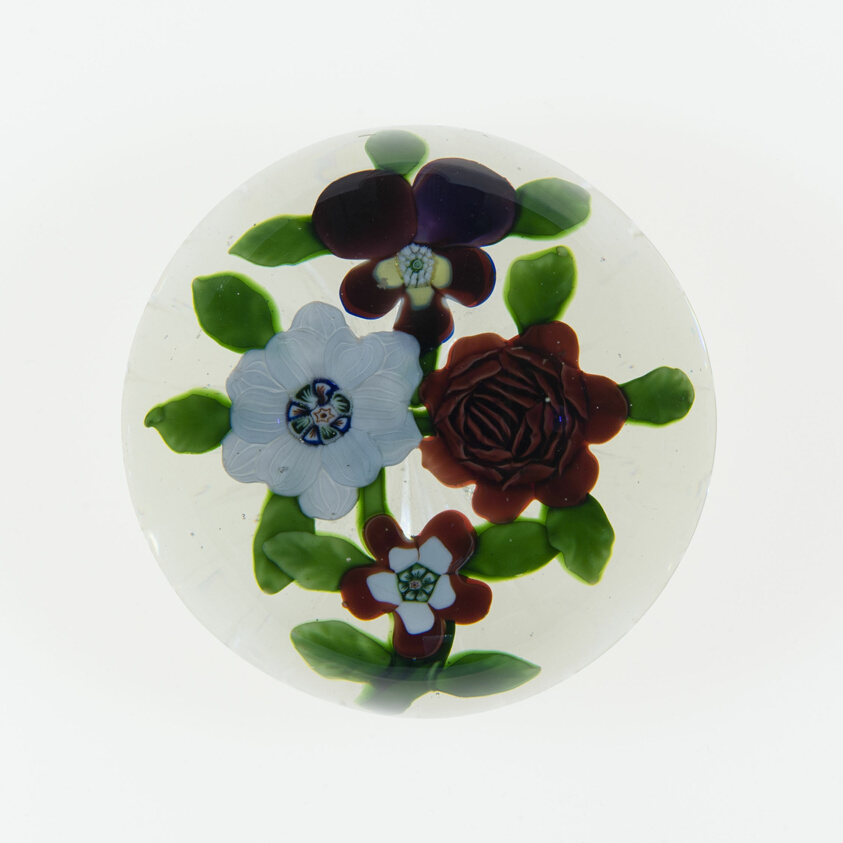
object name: Glass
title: Paperweight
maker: Baccarat Glassworks (Cristalleries de Baccarat); Lorraine, France, founded 1764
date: c. 1845–60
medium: Glass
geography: Baccarat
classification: paperweight; glass